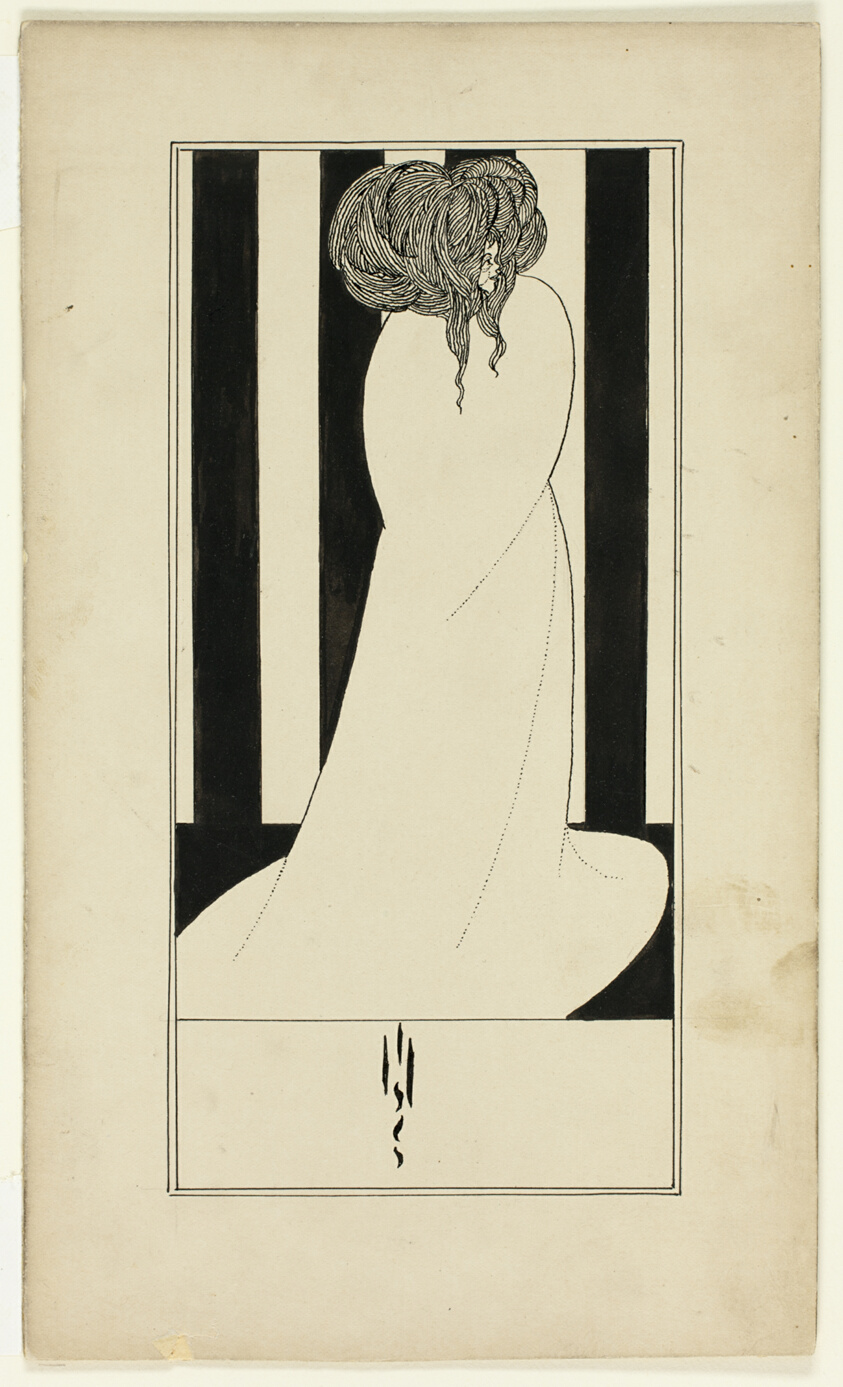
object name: Drawing and Watercolor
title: Woman Against Striped Wallpaper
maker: Aubrey Vincent Beardsley, imitator of; English, 1872-1898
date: 1892/98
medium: Pen and brush and black ink, over traces of graphite, on buff wove paper, laid down on board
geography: England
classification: pen and ink drawings; drawings (visual works); prints and drawing